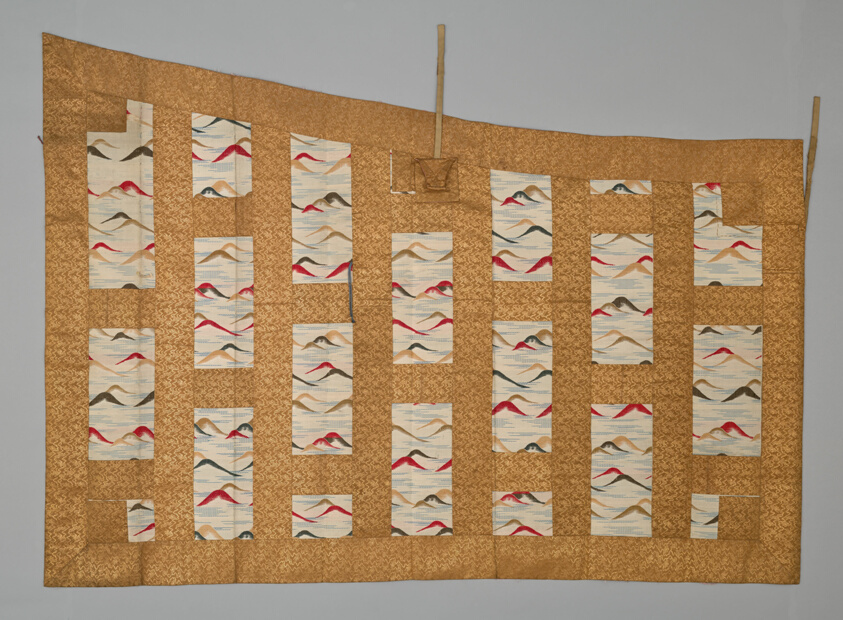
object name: Textile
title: Kesa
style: meiji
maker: Japan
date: Meiji period (1868–1912), 1868/1900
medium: Heri, shiten, niten: silk and gold-leaf-over-lacquered-paper strip, warp-float faced 2:1 'Z' twill weave with weft-float faced 1:2 'S' twill interlacings of secondary binding warps and supplementary patterning wefts; jô, yô: silk, plain weave with plain interlacings of secondary binding warps and supplementary patterning wefts and with supplementary patterning warps; straps: silk, warp-float face 2:1 'S' twill weave; cords: silk: 2:2 twill oblique interlacing; lining: silk, plain weave; interlining: hemp, felted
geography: Japan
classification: textile; weaving; liturgical - buddhist